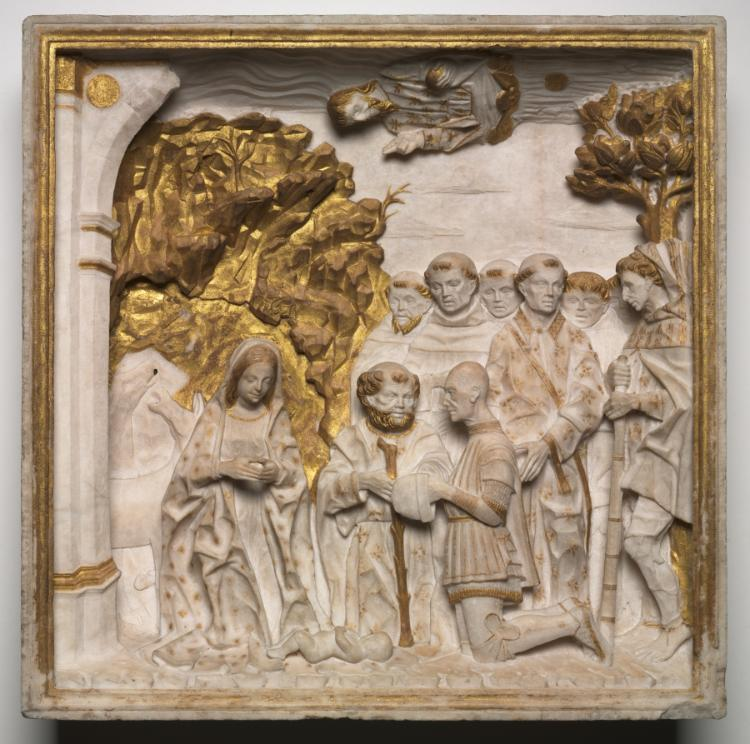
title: Pier Francesco Visconti, Court of Saliceto, Adoring the Christ Child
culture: Italy, Milan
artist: workshop of Benedetto Briosco (Italian, c. 1460–after 1514)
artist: and Tomaso Cazzaniga (Italian)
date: shortly after 1484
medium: marble with gilding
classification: Sculpture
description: This relief formed part of a public funerary monument in the church of Santa Maria del Carmine in Milan. The military leader and diplomat humbly kneels in profile before the infant Christ in a naturalistic setting, drawing attention to the Holy Family’s humanity and the deceased man’s reverence.